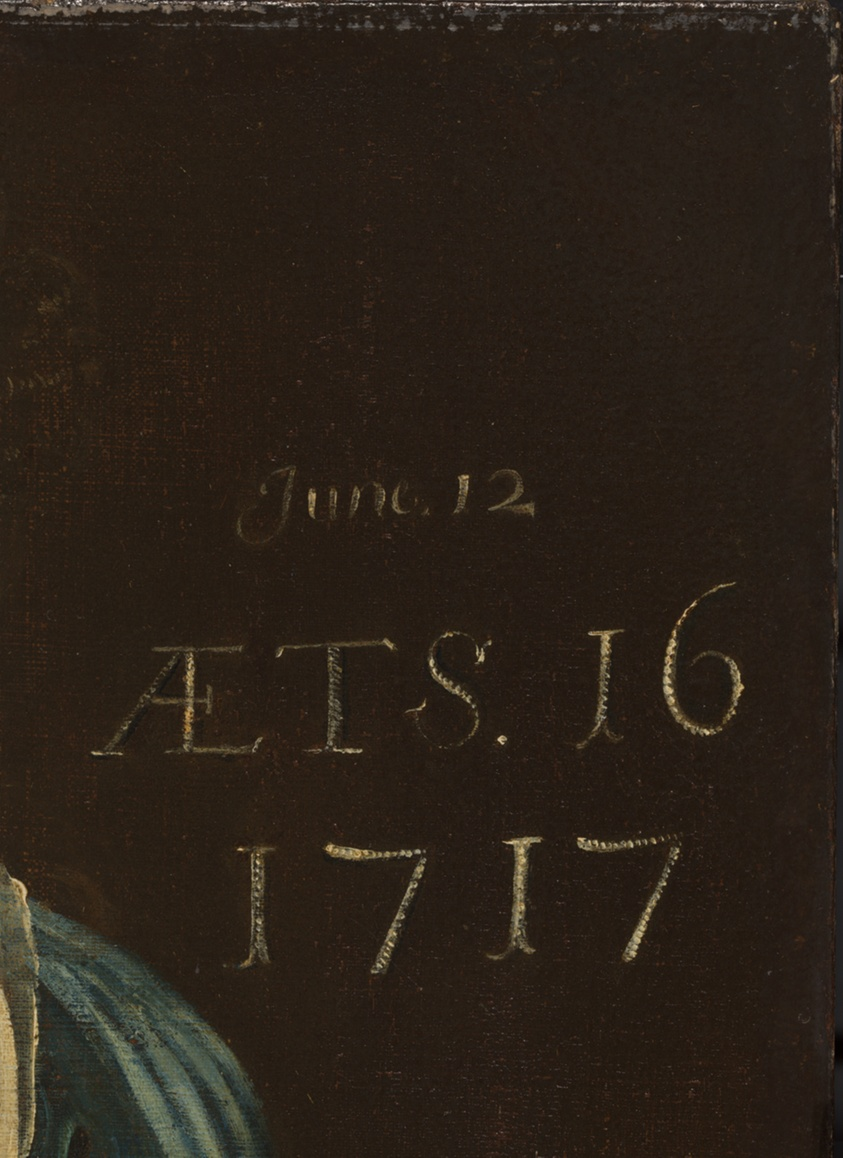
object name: Painting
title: Miss Vanderveer, or Miss Vandeveer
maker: Artist unknown (American, 18th century); Formerly attributed to John Watson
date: 1717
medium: Oil on canvas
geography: United States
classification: painting; american arts